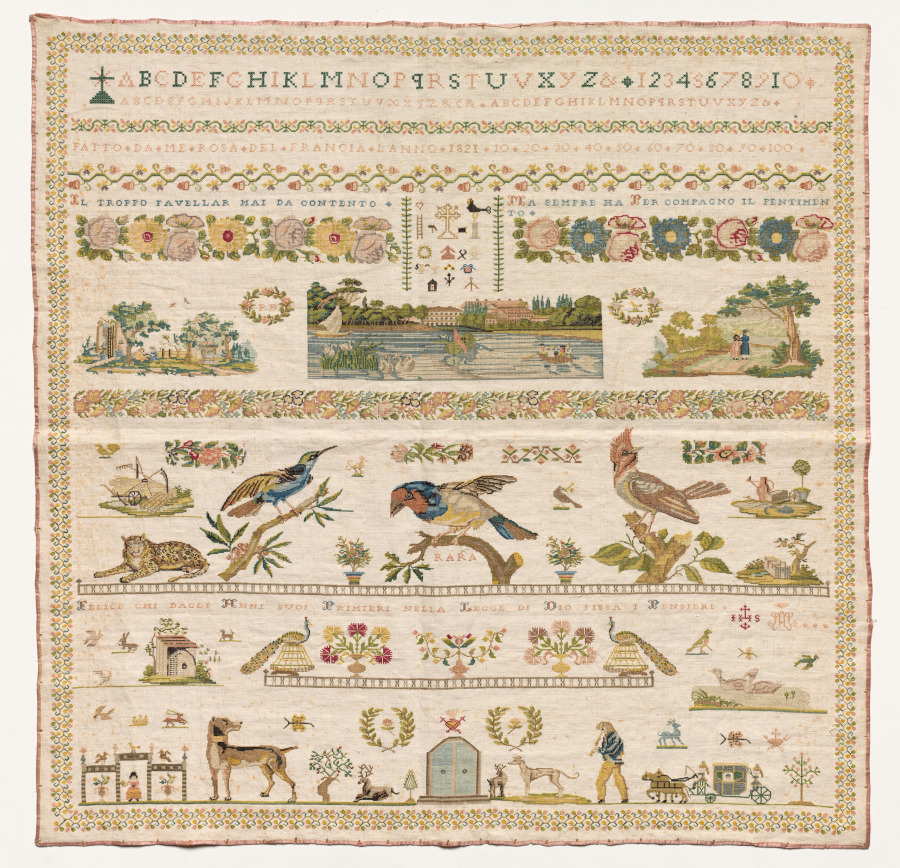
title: Sampler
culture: Italy, 19th century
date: 1821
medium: embroidery; silk on cotton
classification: Sampler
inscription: (see Notes section in Miscellaneous Object Data.)